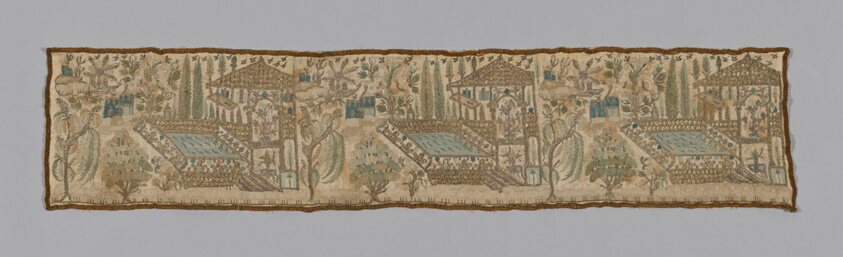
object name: Textile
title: Fragment (Border from wide Towel)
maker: Turkey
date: 1775/1900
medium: Embroidered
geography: Turkey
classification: textile; needlework (visual works); weaving